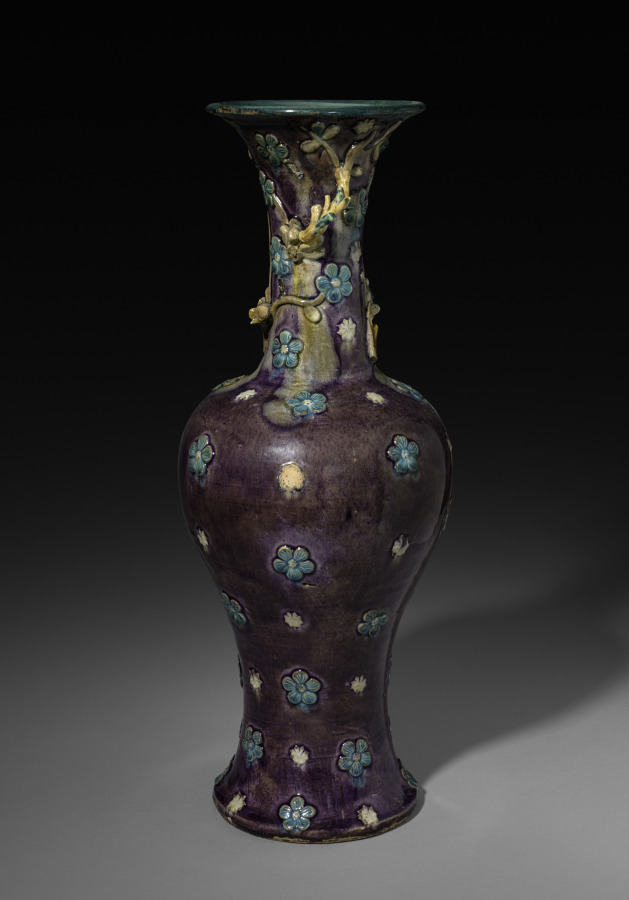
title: Vase with Branch of Plum Blossoms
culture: China, Shanxi province, Ming dynasty (1368-1644)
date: 1500s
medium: Glazed stoneware with molded and modeled decoration, Fahua ware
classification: Ceramic